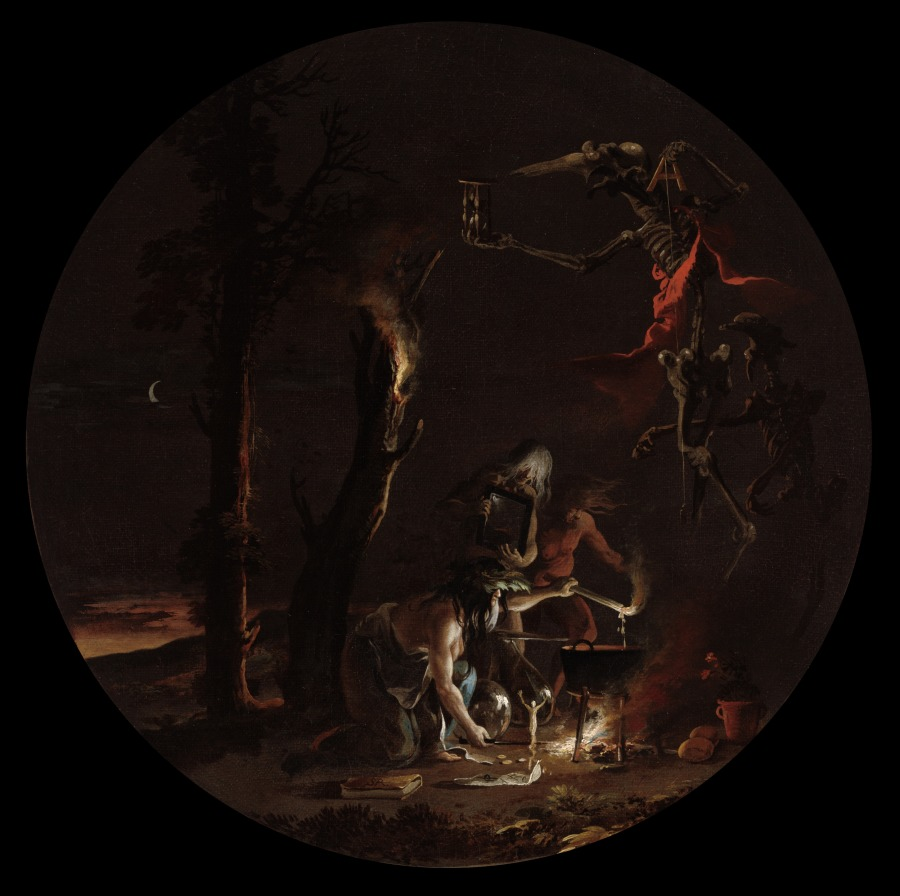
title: Scenes of Witchcraft: Evening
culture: Italy, 17th century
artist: Salvator Rosa (Italian, 1615–1673)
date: c. 1645–49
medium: oil on canvas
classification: Painting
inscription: Signed: "SR [monogram]"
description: At dusk, Rosa's hags gather around a cauldron. Above their incantations soars a conjured skeleton holding an hourglass symbolizing the brevity of life. In its left hand, the demonic creature holds a capital letter A from which extends a plumb line; as ancient signs of the moon and judgment, this strange combination of symbols embodies the nocturnal judgment the witches are doling out below. Though more rare in paint, the detailed portrayal of witches at their spells enjoyed a long literary tradition. The wax effigy alludes to classical literature by Virgil and Horace that described love magic. Poets in the 1500s and 1600s continued the tradition, writing verse about witches concocting potions and performing love spells. In Rosa's own poem "La Strega (The Witch)," the jilted Phyllis vows to take revenge on her feeble lover, listing the ingredients for her black magic: "ground powders, mystic gems, snakes and owls, stinking blood. . . ." Painting was considered "mute poetry" in the 1600s, and Rosa often explored the same themes in his written and painted art—a clever way to gain fame as a unique intellect.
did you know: The artist chose the painting's shape to reference the foundational role of the circle in practicing magic.